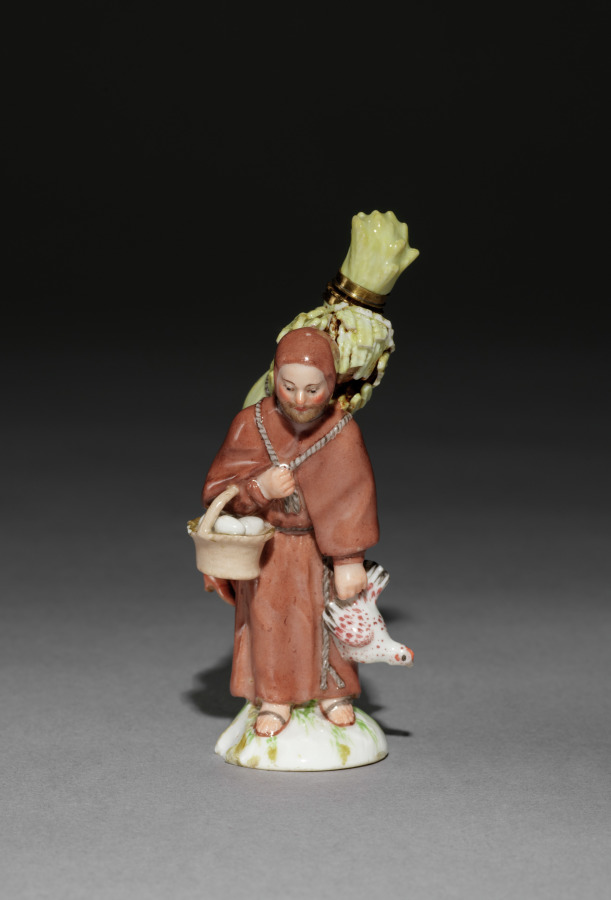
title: Scent Bottle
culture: Germany, Berlin, 18th century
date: 1780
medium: porcelain with gilt metal mounts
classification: Miscellaneous